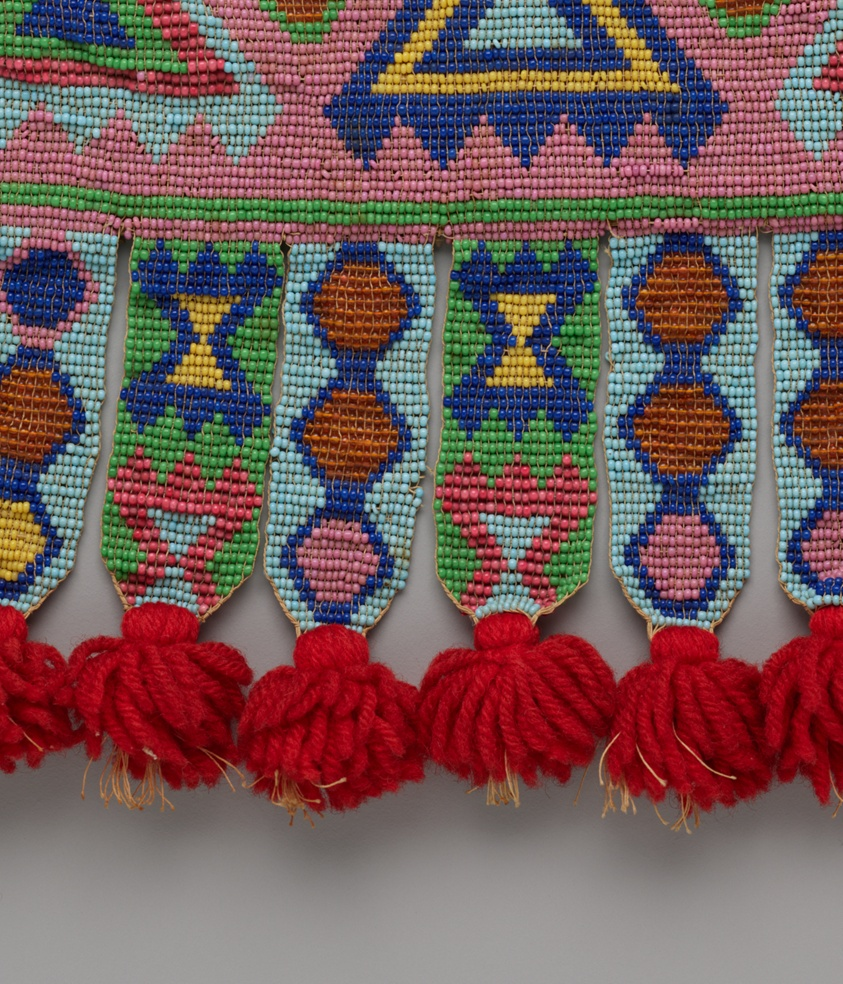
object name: Costume and Accessories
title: Man's Shoulder Bag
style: potawatomi, native american, americas, Arts of the Americas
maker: Maker unknown (Potawatomi); Great Lakes region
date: Mid–late 19th century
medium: Cotton, velvet, yarn, and glass seed beads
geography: Great Lakes Region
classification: beadwork; costume accessory; costume; art of the americas